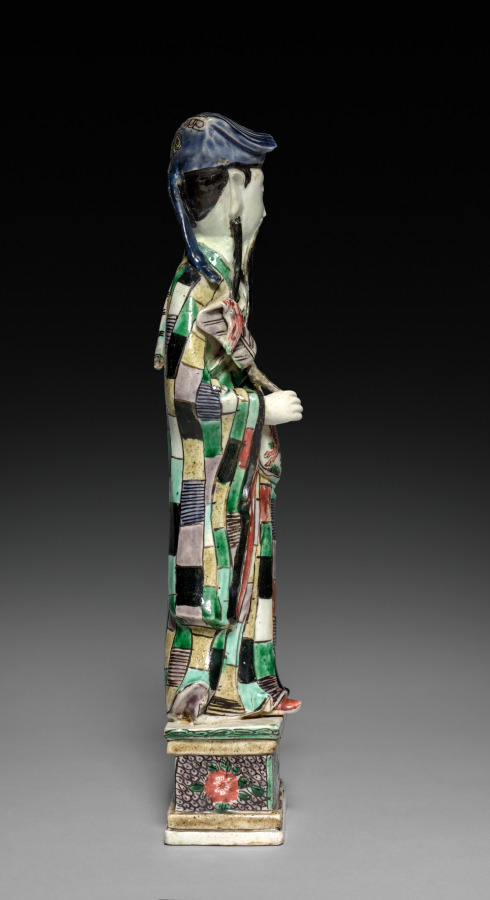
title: Daoist Immortal Zhongli Quan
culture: China, Jiangxi province, Jingdezhen kilns, Qing dynasty (1644-1911), Kangxi reign (1662-1722)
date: 1662–1722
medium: porcelain with famille verte overglaze enamel decoration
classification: Ceramic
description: This porcelain figure represents Zhongli Quan as a scholar. He is wearing a scholar’s hat and carries a scroll on his back. He holds a fan that, according to legend, could bring the dead to life. Thus, he also bears the auspicious meaning of longevity. On his bare belly, the potter painted a qilin, a mythical auspicious creature that turns his head to the sun. The same design in different colors also decorates his back.